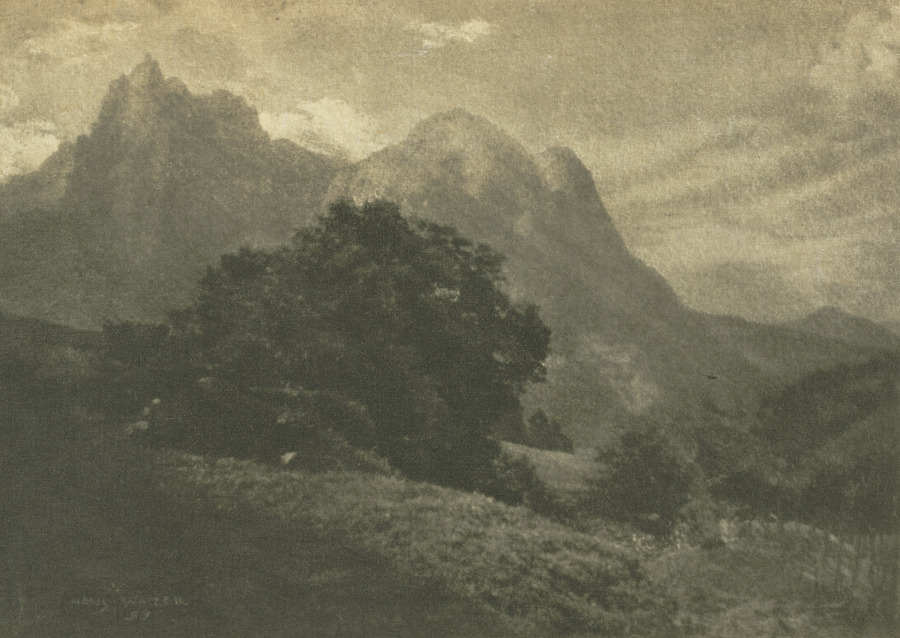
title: Camera Work: Mountain Landscape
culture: Austria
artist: Hans Watzek (Austrian, 1848–1903)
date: 1906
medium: photogravure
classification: Bound Volume